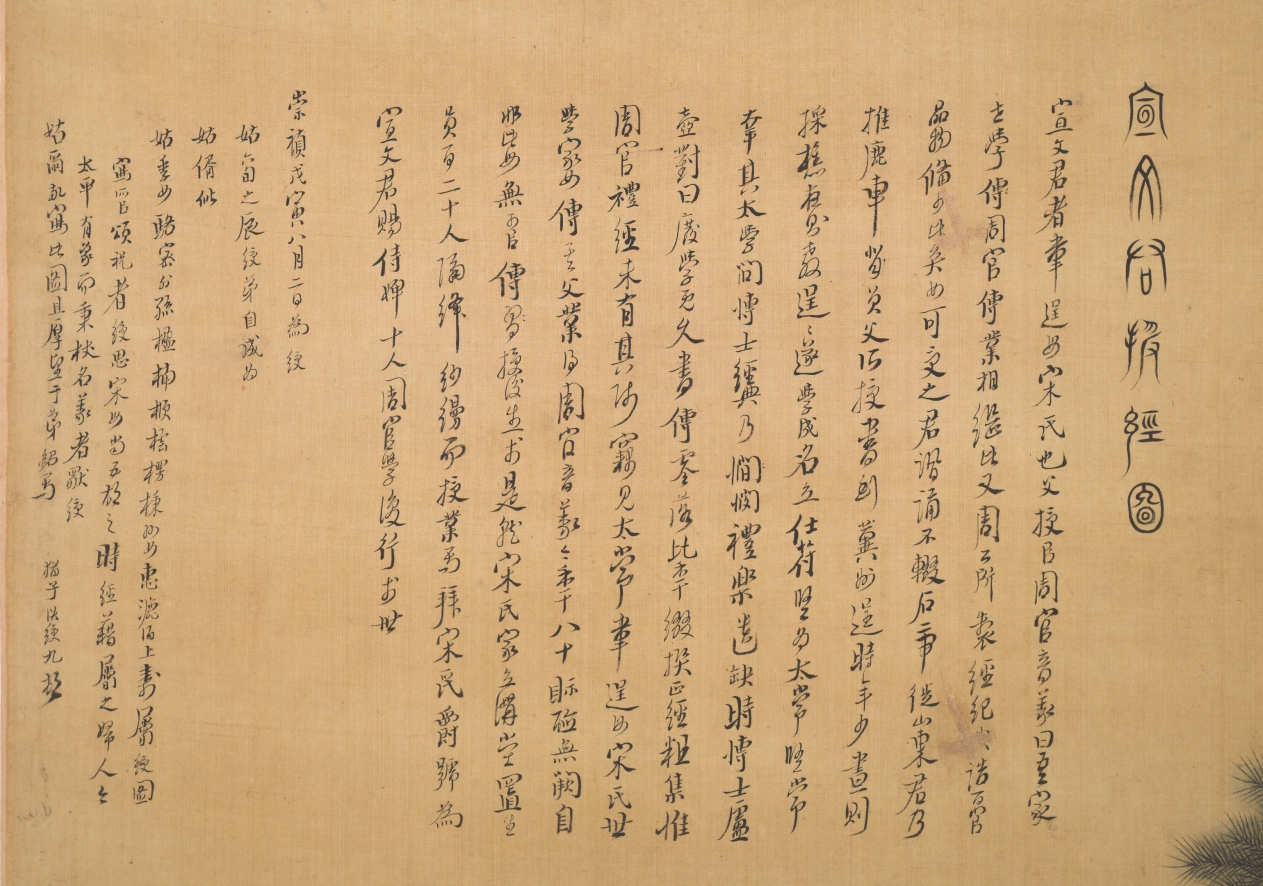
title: Lady Xuanwen Giving Instruction on the Rites of Zhou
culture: China, Ming dynasty (1368–1644)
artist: Chen Hongshou (Chinese, 1598/99–1652)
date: 1638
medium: Hanging scroll; ink and color on silk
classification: Painting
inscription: 宣文君者韋逞母宋氏也。父授以周官音義，曰：吾家世學傳周官。傳業相繼。此又周公所製，經紀〔典〕誥百官品物備於此矣。女可受之。君諷誦不輟。石帝徙山東。君乃推鹿車，背負父所授書到冀州。逞時年少。晝則採樵，夜則教逞。逞遂學成名立。仕符堅為太常。堅常幸其太學，問博士經典。乃憫禮樂遺缺。時博士盧壺對曰：廢學既久，書傳零落。比年綴撰，正經粗集。惟周官、禮經，未有其師。竊見太常韋逞母宋氏世學家，女傳其父業。得周官音義。今年八十。視聽無闕。非此母無可傳授後生。于是就宋氏家立講堂，置生員百二十人。隔絳紗縵而授業焉。拜宋氏爵，號為宣文君。賜侍婢十人。周官學後行于世。 崇禎戊寅八月二日，為綬姑六旬之辰。綬弟自成為姑偦。偕姑季女駱密、外孫楹、楠、楩、橒、楞、棅、孫女惠、漉酒上壽，屬綬圖寫，所以頌祝者。綬思宋母尚五胡之時，經藉屬之婦人；今太平有象，而秉杖名義者，獨綬姑爾。敬寫此圖，且厚望于弟紹焉。猶子洪綬九頓首。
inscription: 5 additional seals: 2 of Xu Weiren 徐渭仁(1788－1855); 2 of Sun Zutong 孫祖同 (1894–1937); 1 of C. C. Wang 王季遷 (1907–2003).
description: This painting by Chen Hongshou depicts the story of Xuanwen Jun, or Lady of Literary Propagation, at a venerable age, instructing young scholars on the Confucian classics. It was painted for Chen’s aunt in celebration of her 60th birthday. Chen’s painting style is archaic in the use of fine outlines and brilliant coloring with mineral pigments. In depicting the figures, he uses the “iron-wire” brush style (fine, even lines) with deliberate control. The faces are elongated and exaggerated. A few ritual bronzes lend the scene an antique flavor.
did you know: Chen Hongshou's long inscription at the top of the painting compares his virtuous aunt with the historical exemplar, Lady Xuanwen.